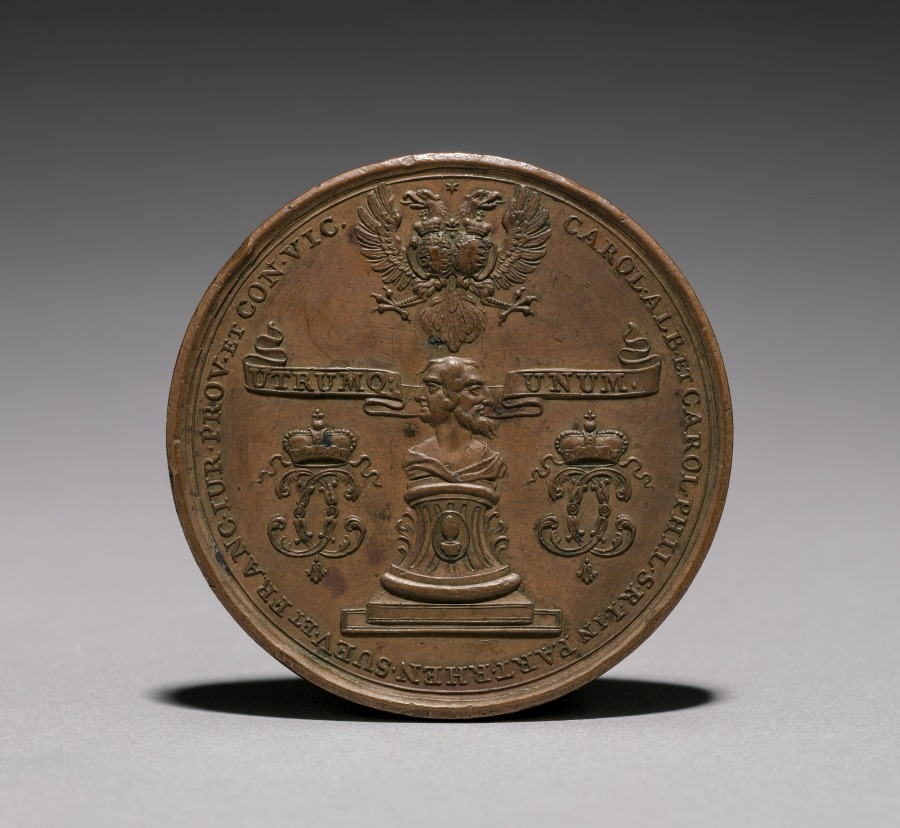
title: Augsburg Medal (reverse)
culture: France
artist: Thiebaud (French)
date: 1742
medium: bronze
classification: Metalwork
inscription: Aug. Vind. D. L. Feer. MDCCXLI. Claus. I.B.I.D. XX Feer. Iudiic. G. E. Minivicarit. Rhen. Apert.